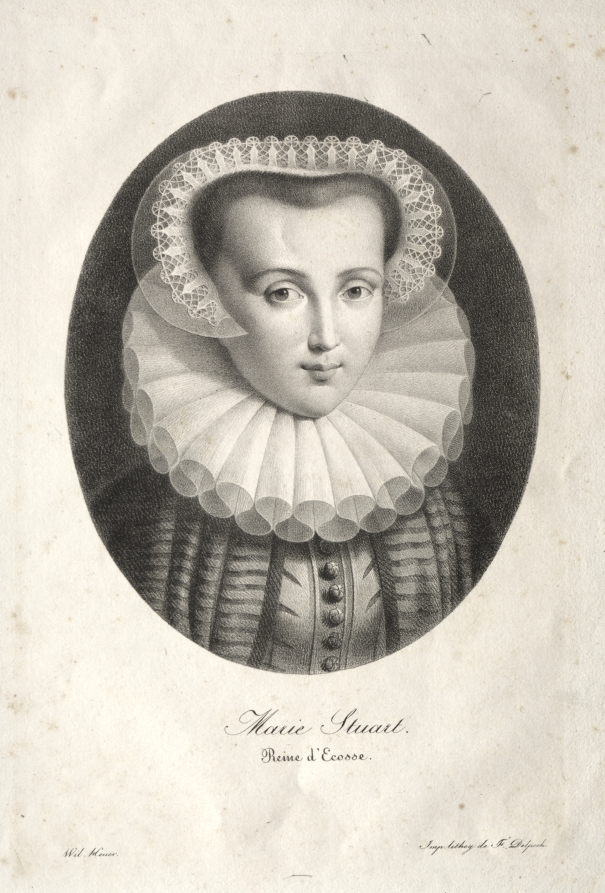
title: Mary Stuart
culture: Germany, 19th century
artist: Christian Ludwig Wilhelm Heuer (German, 1813–1890)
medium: lithograph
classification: Print